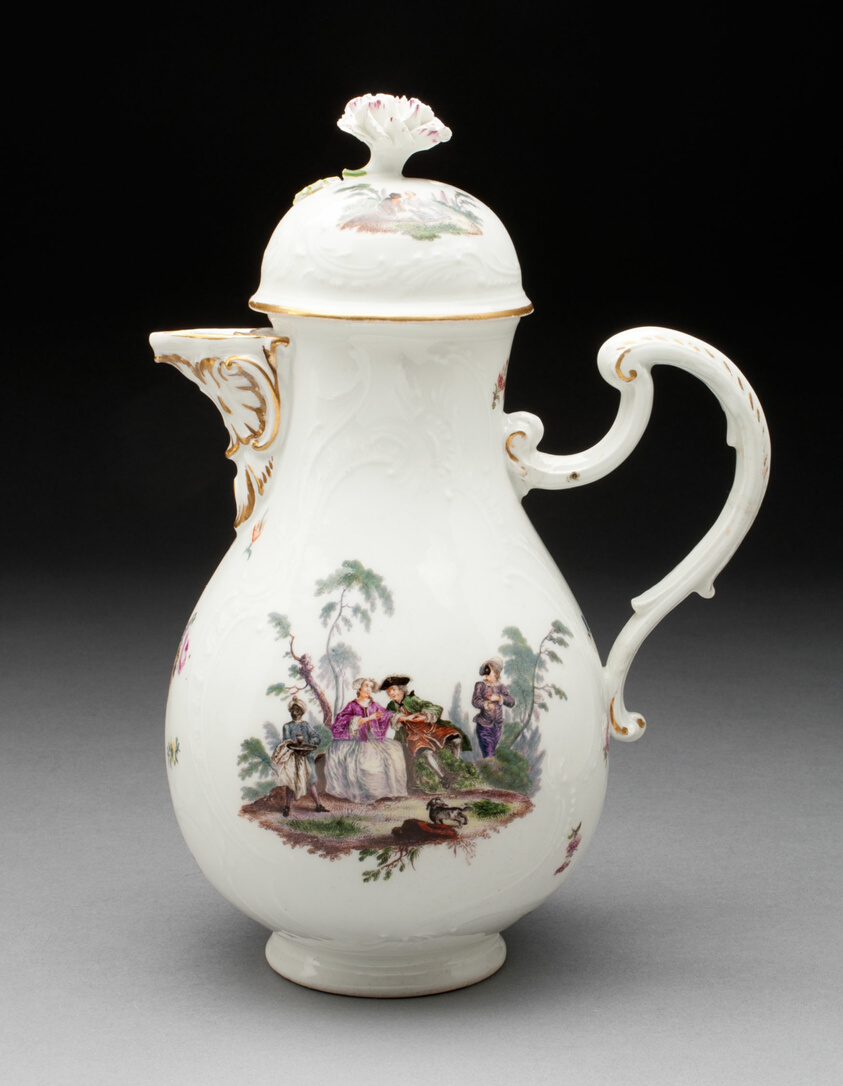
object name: Ceramics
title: Coffee Pot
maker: Meissen Porcelain Manufactory (German, founded 1710)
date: c. 1760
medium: Hard-paste porcelain, polychrome enamels, and gilding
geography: Meissen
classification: teaware; porcelain; european decorative arts; ceramics